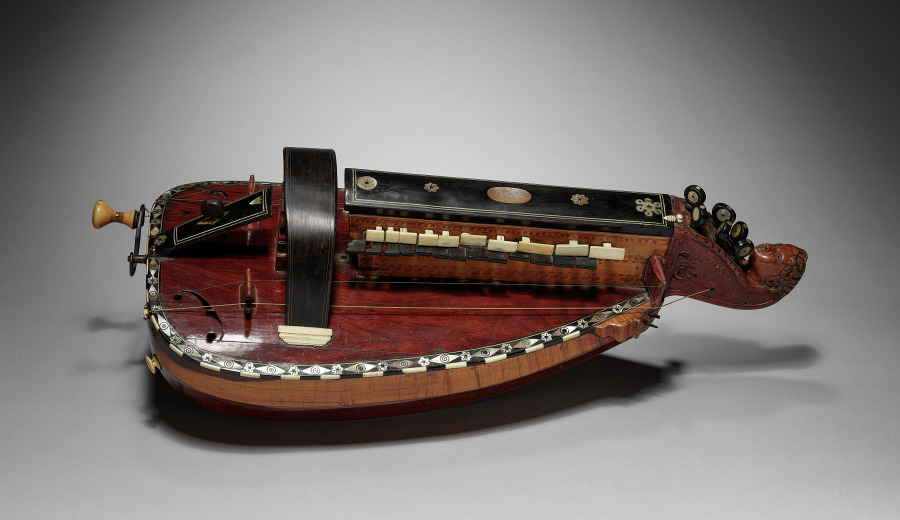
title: Vielle à roue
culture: France, 18th century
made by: Pajot of Jánzat (French)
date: 1700s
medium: wood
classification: Musical Instrument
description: The instrumentalist could play melodies on the keyboard that presses tangents against one or more strings. Often there are also multiple drone strings, which give a constant pitch accompaniment to the melody, resulting in a sound similar to that of bagpipes. This type of instrument is depicted in several artworks in the CMA collection: 1924.656, 2008.34.2, 1960.20. The vielle à roue is also related to the Swedish nyckelharpa, which was featured on the CMA performing arts series in 2017 played by Emilia Amper.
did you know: Also known as a “hurdy-gurdy” or “wheel fiddle,” this instrument produces sound by a hand crank-turned rosined wheel rubbing against the strings.